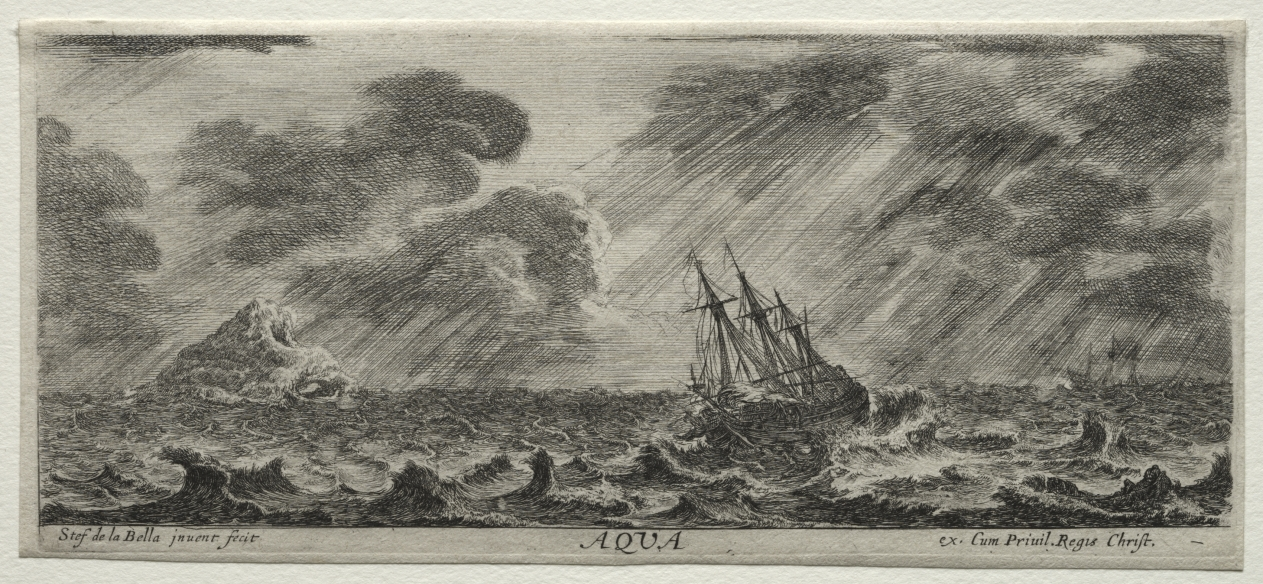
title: The Four Elements: Aqua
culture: Italy, 17th century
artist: Stefano Della Bella (Italian, 1610–1664)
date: c. 1648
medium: etching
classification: Print